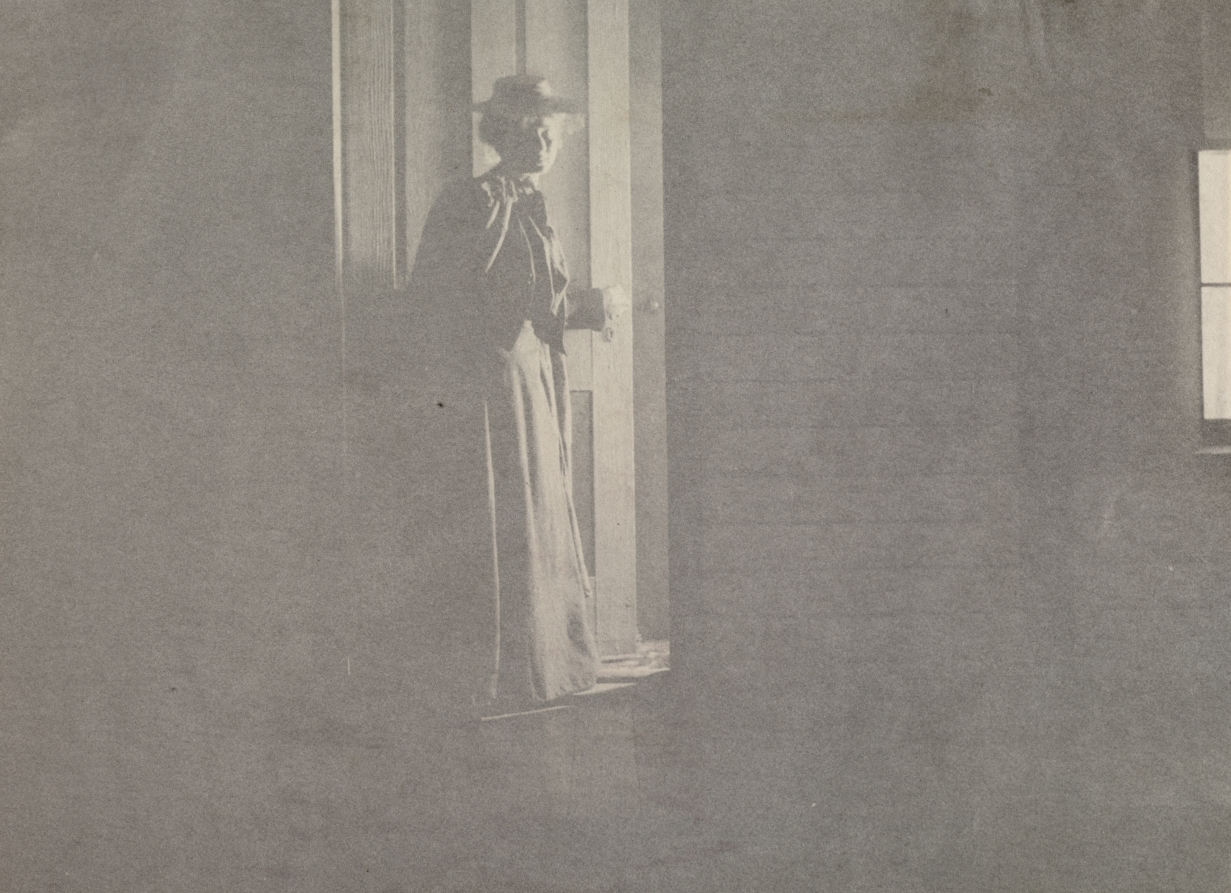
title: Illustration for "Beneath the Wrinkle"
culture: America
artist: Clarence H. White (American, 1871–1925)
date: 1903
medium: platinum print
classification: Photograph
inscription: Written in pencil on verso: "By Clarence White / Illustration for story by Clara Morris (?)"